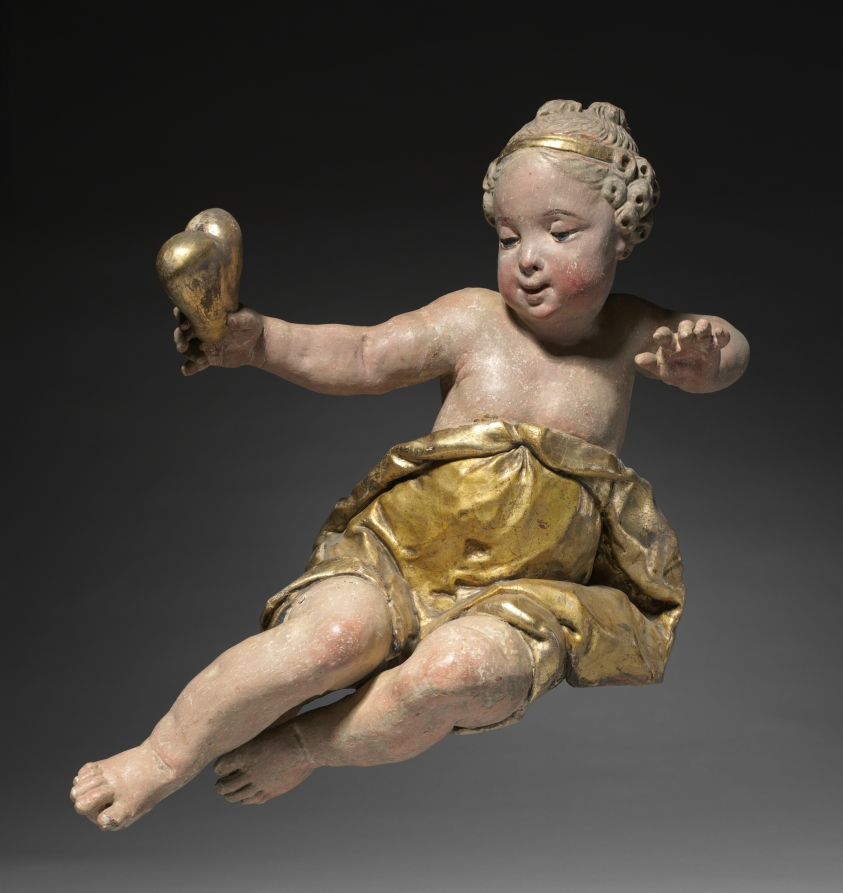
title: Putto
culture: Germany, near Bamberg, 18th century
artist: Ferdinand Tietz (Austrian, 1708–1777)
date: mid-1700s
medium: painted and gilded wood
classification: Sculpture